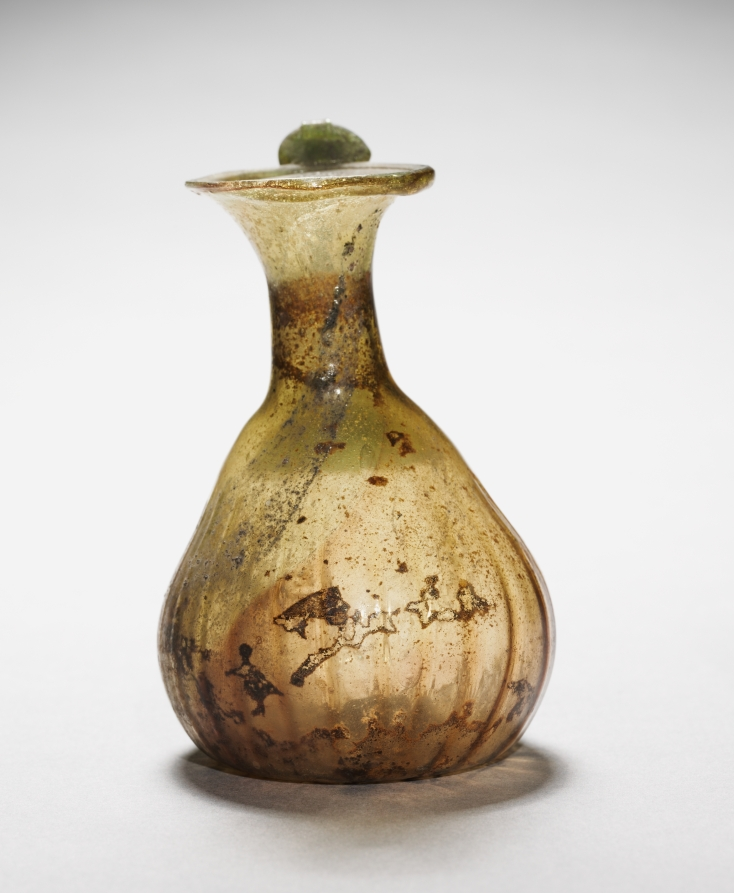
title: Pitcher with Handle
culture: Syro-Palestinian, Roman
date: 300s CE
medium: glass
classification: Glass